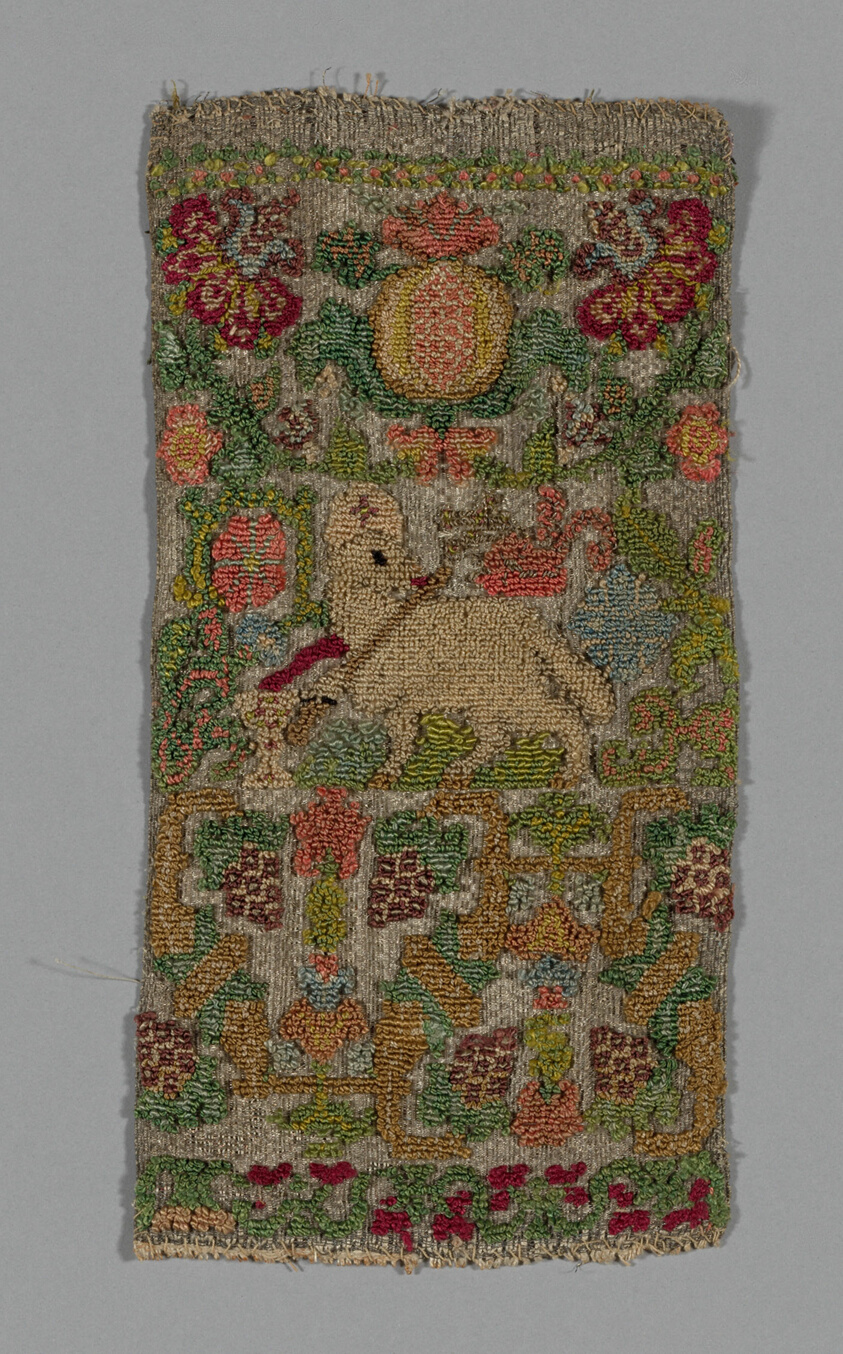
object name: Textile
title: Fragment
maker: Spain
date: 19th century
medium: silk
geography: Spain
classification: textile; weaving